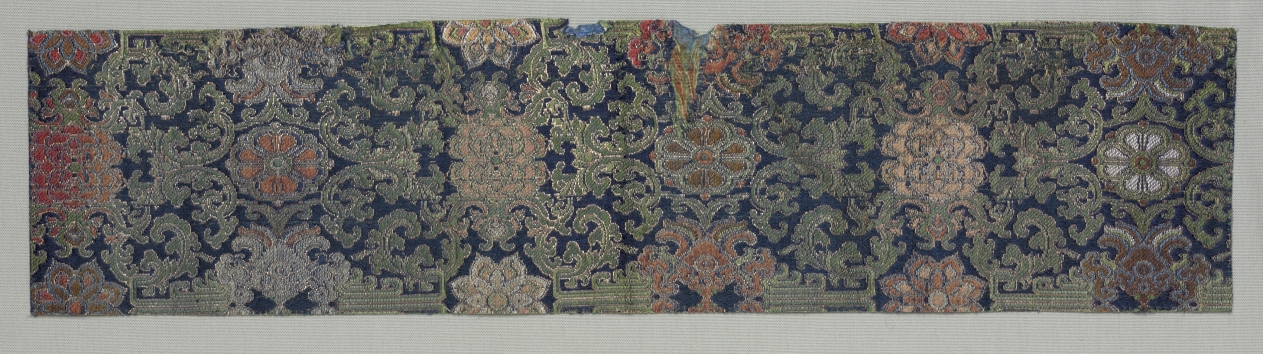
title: Textile Fragment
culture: Japan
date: 1800s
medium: silk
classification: Textile